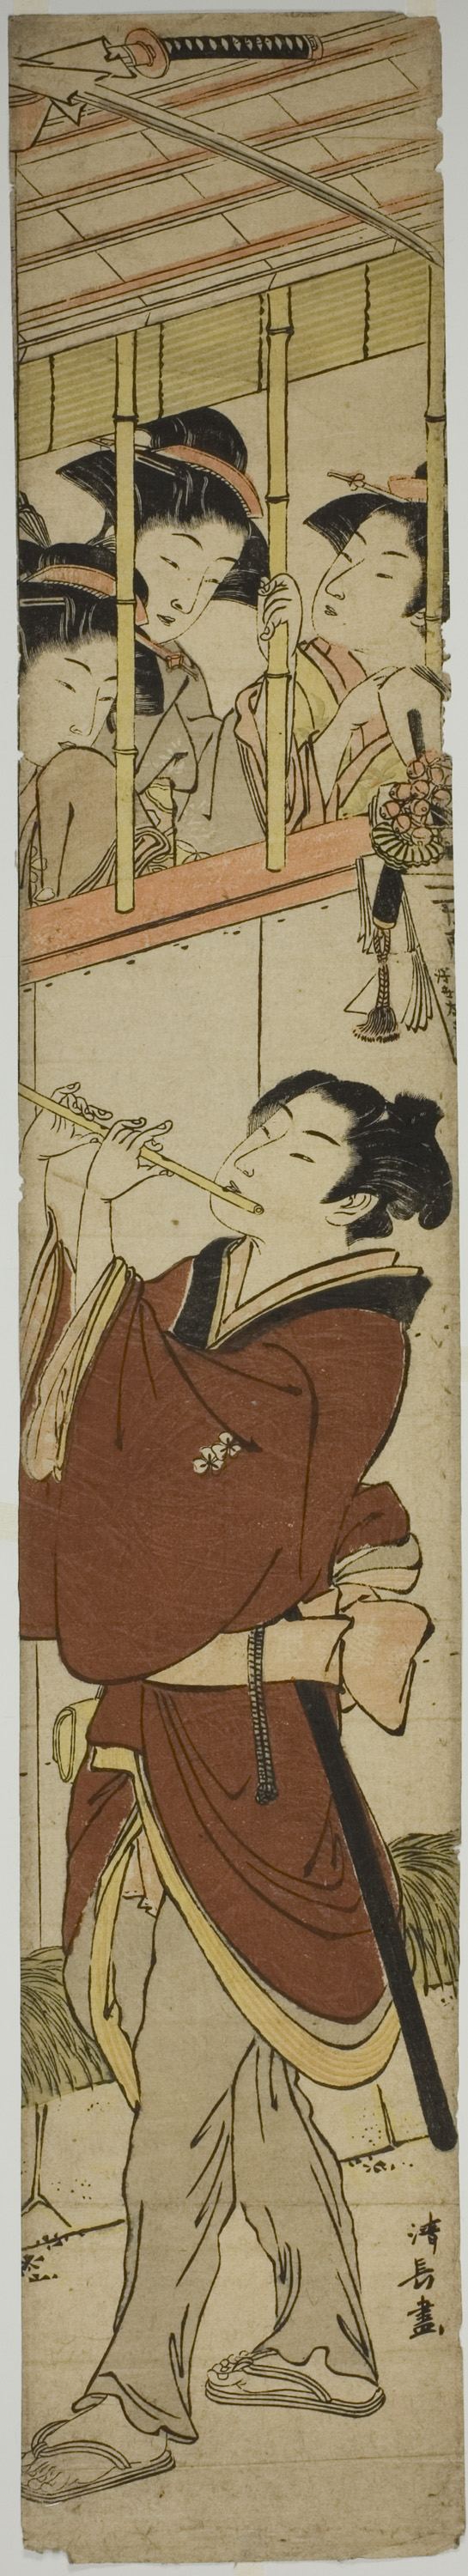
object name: Print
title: Young Man Playing Flute as Three Girls Watch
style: Japanese (culture or style)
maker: Torii Kiyonaga (Japanese, 1752-1815)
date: c. 1782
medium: Color woodblock print; hashira-e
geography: Japan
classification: woodblock print; print; asian art